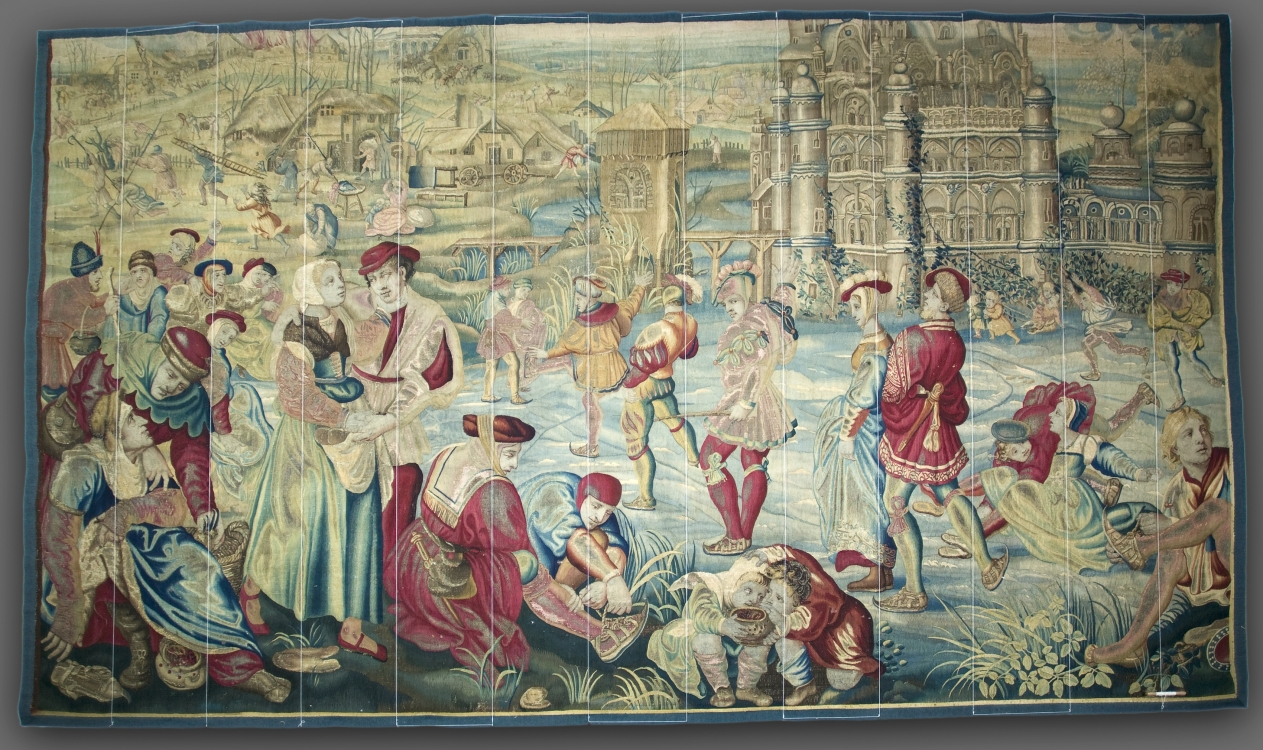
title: Winter: Skating Scene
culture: France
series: Four Seasons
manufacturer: possibly by Gobelins Manufactory (France, Paris, est. 1662)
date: designed c. 1535, woven mid- to late 1600s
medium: Wool, silk, and gold filé: tapestry weave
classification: Tapestry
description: People of all classes and ages enjoyed ice skating, a winter pastime popularized in the Netherlands. Here, some couples are already skating and slipping on the ice, while others tie on their skates or huddle around braziers (portable coal heaters) to keep warm. One affectionate couple in the foreground hold hands as they walk. A castle on the far edge of the frozen lake occupies the background. In the left distance, several small figures holding ladders and long hooks run toward a building that has caught on fire, a frequent occurrence in the winter when wooden houses were heated by fireplaces.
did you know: If you look closely you can see that the top edge of this scene is missing; look at the top of the castle on the right or the forest fire on the left.